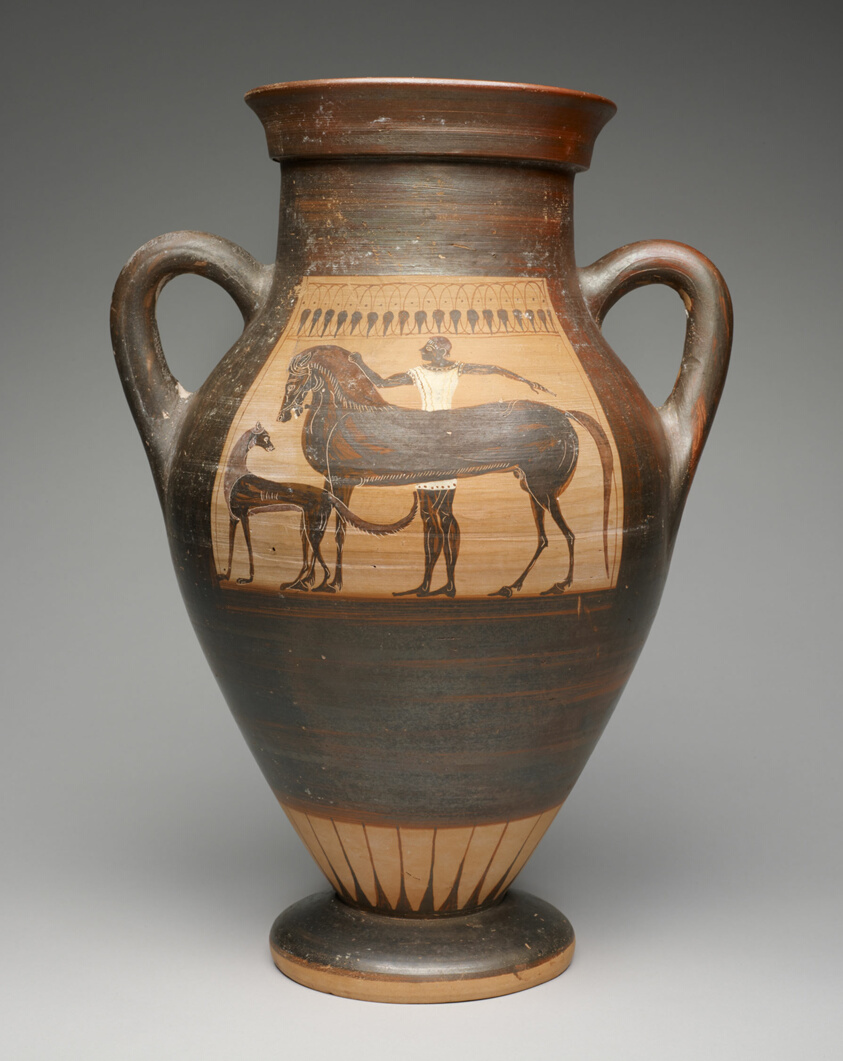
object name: Vessel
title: Amphora (Storage Jar)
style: etruscan, ancient, black-figure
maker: Attributed to the Ivy Leaf Group; Etruscan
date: 530-520 BCE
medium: terracotta, black-figure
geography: Etruria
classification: vessel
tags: animals